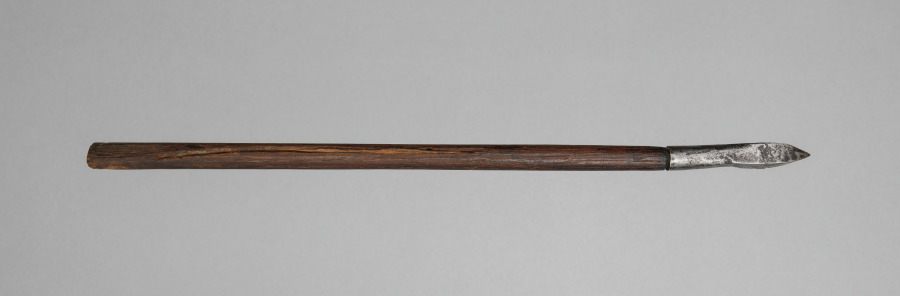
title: Crossbow Bolt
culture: Germany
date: 1500s-1600s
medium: wood, leather, steel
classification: Arms and Armor